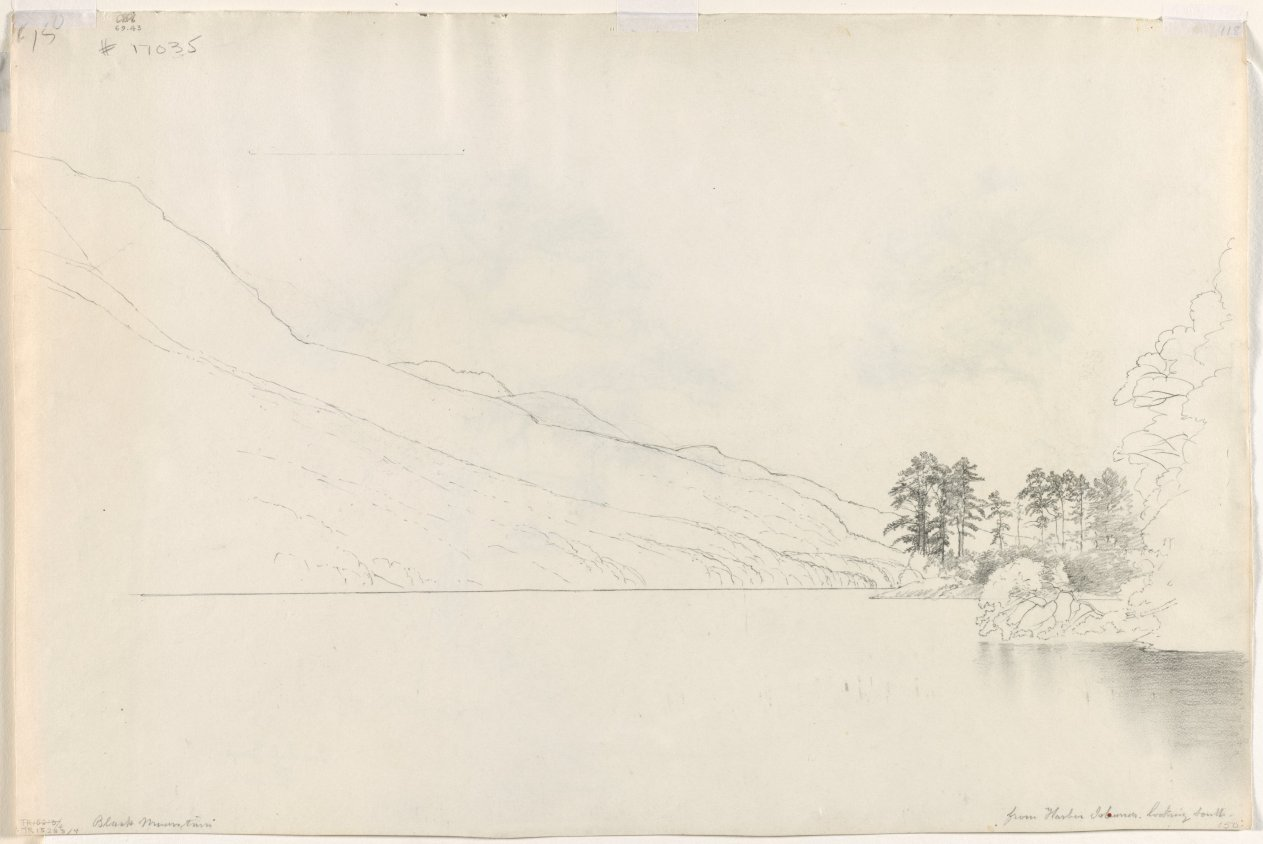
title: Pine, Lake George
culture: America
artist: David Johnson (American, 1827–1908)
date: 1871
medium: pencil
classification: Drawing